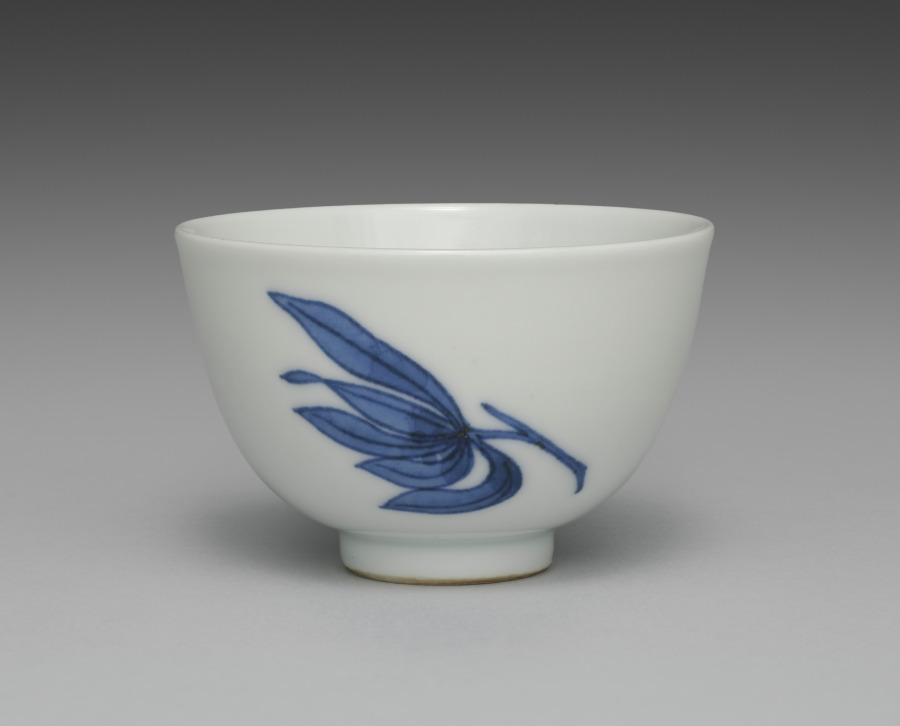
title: Teacup from Tea Set with Orchids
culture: Japan, Meiji period (1868–1912)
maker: Seifū Yohei III (Japanese, 1851–1914)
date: c. 1893–1914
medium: Porcelain with underglaze blue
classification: Ceramic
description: Although the teapot here is stored in a separate box from the five cups, these six pieces may once have been part of a tea set that included other tools such as a water cooler. The teacups have orchid flowers on both sides in underglaze blue, as well as a blue band inside the footring. The teapot has the same design and a blue band painted around the bottom of the lid’s knob. The cups’ long wood storage box is stamped on the exterior, over the lid and base, with a small red seal reading “Satō.” The same seal appears on five small squares of yellow textile, one placed in the bottom of each compartment in the teacup storage box. These are additional to the customary yellow cloths stamped with a “Seifu” seal. Interestingly, four of the Seifū cloths are stamped with an ovoid seal, while the remaining cloth, which is a slightly lighter color, has an unusual seal that is not quite gourd-shaped and with the fū of Seifū in a stylized, unrecognizable form. The teapot has its own box with a Satō seal and is wrapped with an orange textile stamped with the same unusual Seifū seal. A set with a very similar surface design is in the Brooklyn Museum. The Brooklyn set has a water cooler and a small pitcher, in addition to the teapot and cups, and all are in a single storage box. This box records the tea tools as made with kanpakuji, or “bright-jewel white porcelain,” counted among Yohei III’s most important inventions, and carved images. In fact, both sets have a white surface much closer in coloration to the cool white of porcelain clay used in Kyoto at the time, and the designs are simply painted. The Brooklyn set was thus likely mismatched at some point with a box intended for another tea set. Nonetheless, the box may have helped prevent the set’s original components from being dispersed, and the set itself provides insight into how the other tools from the present set may have looked.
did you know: This tea set with orchids has a side-handled pot called a kyūsu, used for steeping, straining, and serving tea.